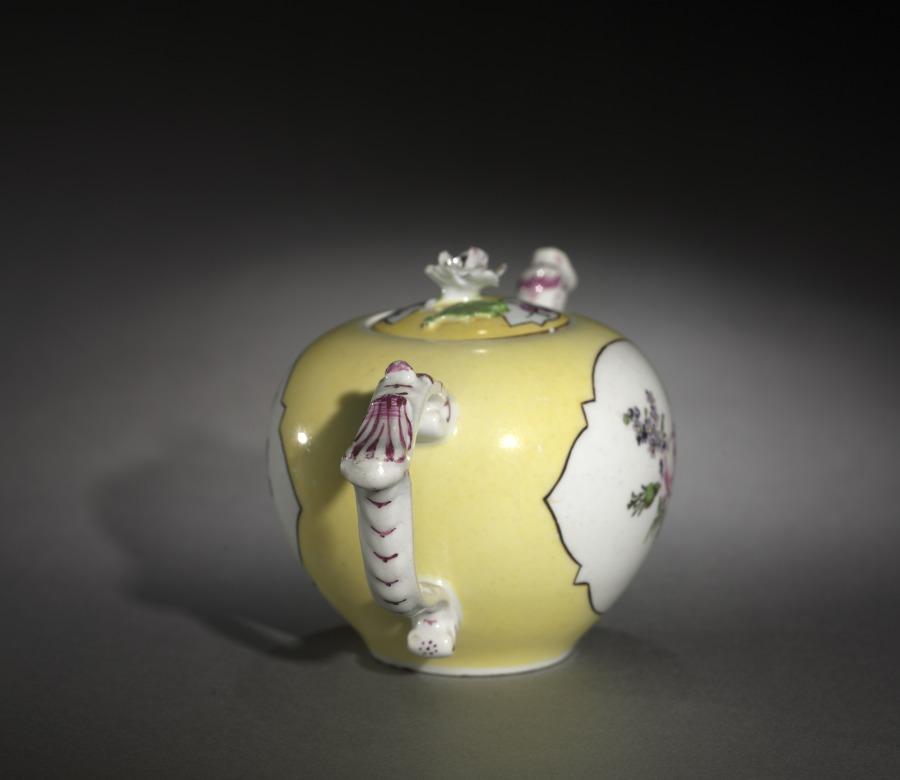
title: Teapot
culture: Germany, Meissen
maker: Meissen Porcelain Factory (German, est. c. 1710)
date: c. 1750–70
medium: porcelain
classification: Ceramic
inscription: Mark on the bottom that looks like two swords crossing, with a small V intersecting.